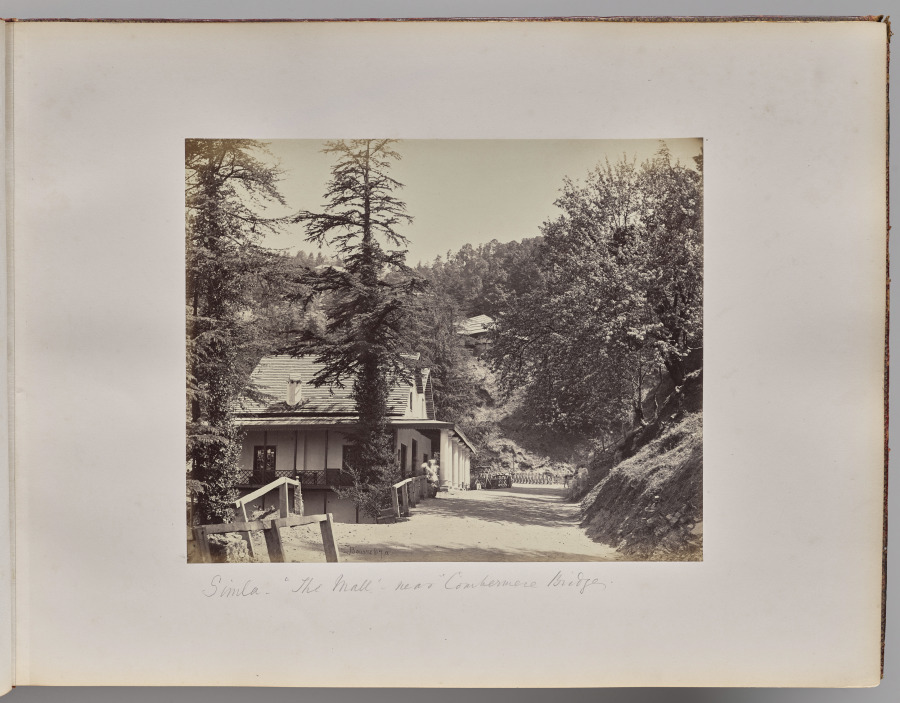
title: Simla. The Mall near Combermere Bridge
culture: England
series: Photographs of Northern India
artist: Samuel Bourne (British, 1834–1912)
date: 1863–70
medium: albumen print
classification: Photograph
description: The 50 images in this album, all taken in the 1860s, move from the hill towns of the Himalayas down to cities including Lahore (now in Pakistan), Delhi, Lucknow, Agra, Benares (now Varansi), and Calcutta (now Kolkata). Architectural studies of major monuments offer valuable historical records of what sites such as the Taj Mahal and the imperial mosque of the Mughal emperors in Delhi looked like before 20th-century restorations.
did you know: Samuel Bourne, the author of most the images in this album, was a banker in England before he moved to India to become a professional photographer.